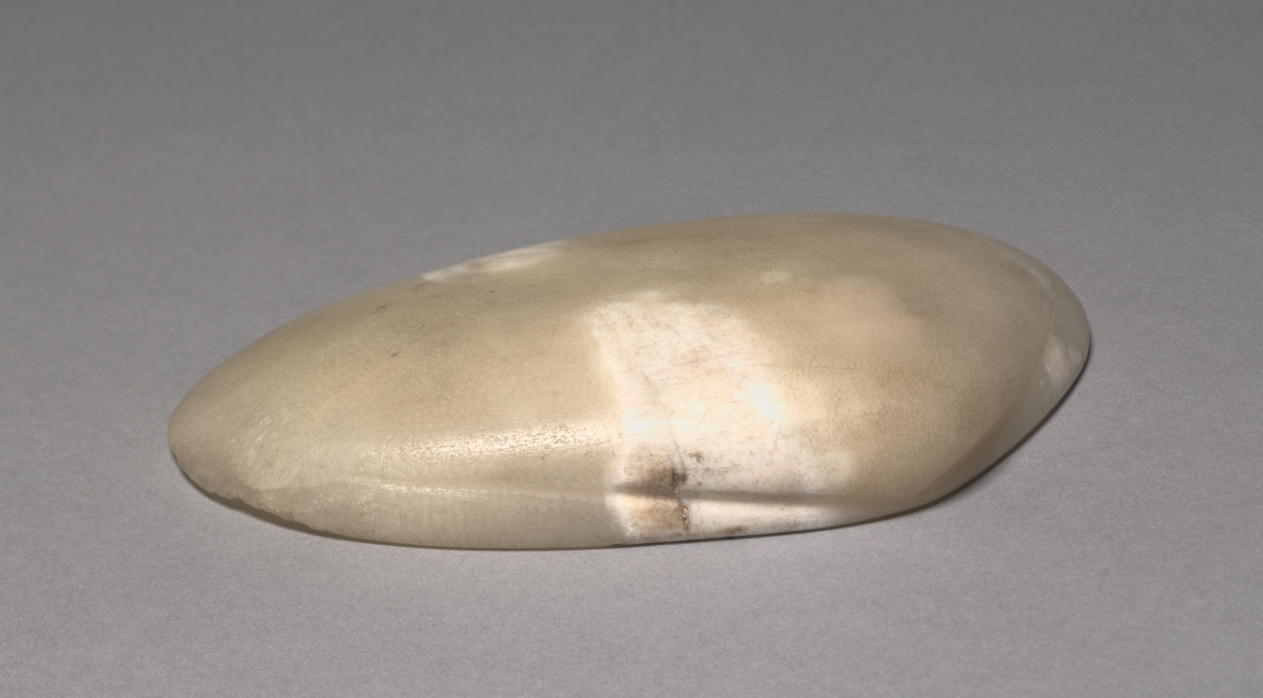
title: Dish in the Form of a Shell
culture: Egypt, New Kingdom (1540–1069 BCE), Dynasty 18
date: 1540–1296 BCE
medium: travertine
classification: Vessels